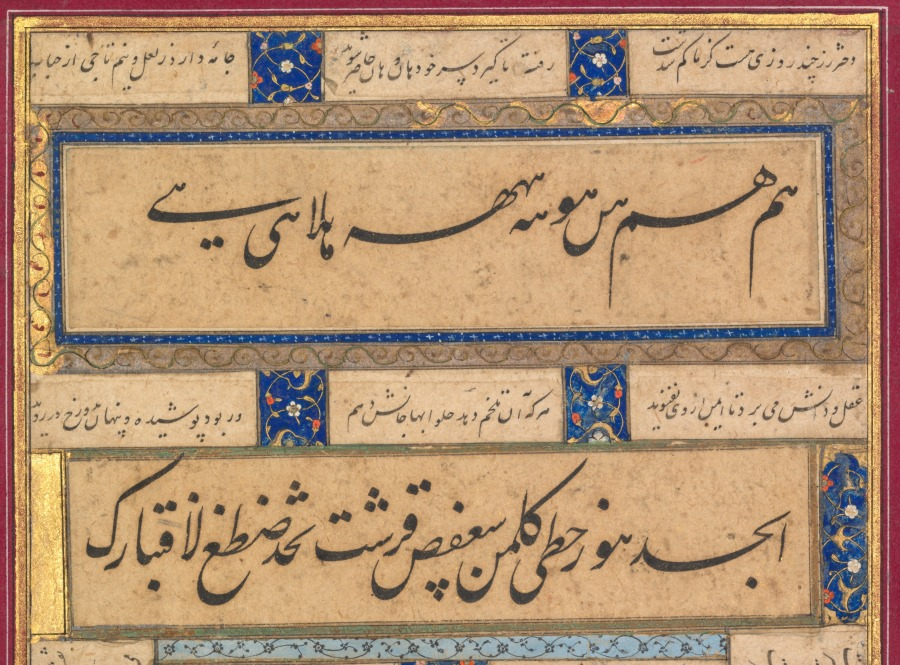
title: Calligraphic exercises and verses of Hafiz (Persian, about 1325–1389) (verso)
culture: Persian, Uzbekistan, Bukhara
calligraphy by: Mahmud ibn Ishaq al-Shahabi (Persian, active mid- to late 1500s)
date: 1575–76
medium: Gum tempera, ink, and gold on paper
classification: Calligraphy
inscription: In center, Persian exercises including on the second line down the “abjad” letters of numeration followed by calligrapher’s signature, in nasta‘liq script: Done by the hand of the sinful slave Mahmud ibn Ishaq al-Shahabi, may God forgive his sins, in the year 982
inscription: Persian verses above from a ghazal of Hafiz (Persian, 1325–1389), in nasta‘liq script: For some days now the Daughter of the Vine has been lost to us,/ Gone away to tend to her own affairs. Be alert and prepared (as a search party)./ Her dress is of rubies and she wears a tiara of delicate glass./ She carries off wisdom and knowledge. Till you feel safe and secure from her, remain alert!/ Whoever will bring her bitter presence to me, I will give him sweet confectionaries (halwa) in exchange,/ And should she be hiding in disguise in the underworld, go down (and seek her out)/ The daughter of the dark-colored (vine) is quick-tempered, petulant, rose-colored and drunk./ Should you find her, take her towards Hafiz’s house.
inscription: Persian verses below, continued from above, in nasta‘liq script: I saw her last night, sauntering and tipsy./ A cup in hand, she was heading towards a gathering of the drunk/ I was so vexed that my poetic powers/ Became distraught and fled away from me/ She was harboring thoughts of Khwarazm and the shores of the Oxus/ With a thousand complaints she was leaving the Kingdom of Solomon/ Gone would be the person who knew the very soul of poetry as no one else./ I was witnessing this and my soul was seeping out of my body/ I protested and much lamented but to no avail/ For this was a matter for the Sultan’s compassion to tend.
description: This fine calligraphic work is signed and dated by a calligrapher who was highly regarded in both Safavid Iran and Mughal India. Mughal albums typically had a painted portrait or figural scene on one side, and a work of calligraphy on the other. The British civil servant Sir Charles Forbes made his album following that format. The verses are a lament over a lack of wine, beginning: For some days now the Daughter of the Vine has been lost to us, Gone away to tend to her own affairs. Be alert and prepared as a search party. Her dress is of rubies, and she wears a tiara of delicate glass.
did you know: The work was part of an album of paintings collected in India before 1811 by a Scottish politician who worked for the British East India Company.